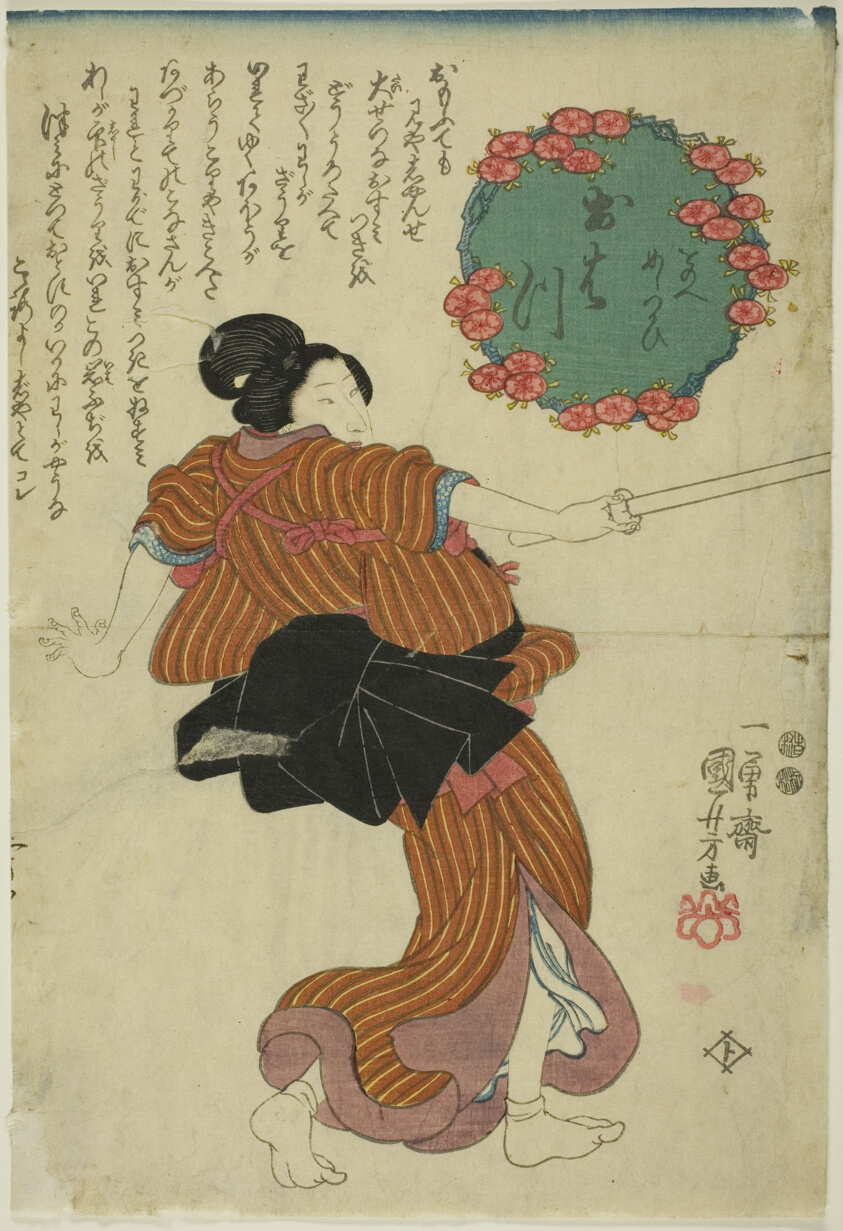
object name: Print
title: Ohatsu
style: Japanese (culture or style)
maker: Utagawa Kuniyoshi (Japanese, 1797-1861)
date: c. 1847/48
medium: Color woodblock print; center sheet of oban triptych (right: 1901.116)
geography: Japan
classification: woodblock print; print; asian art